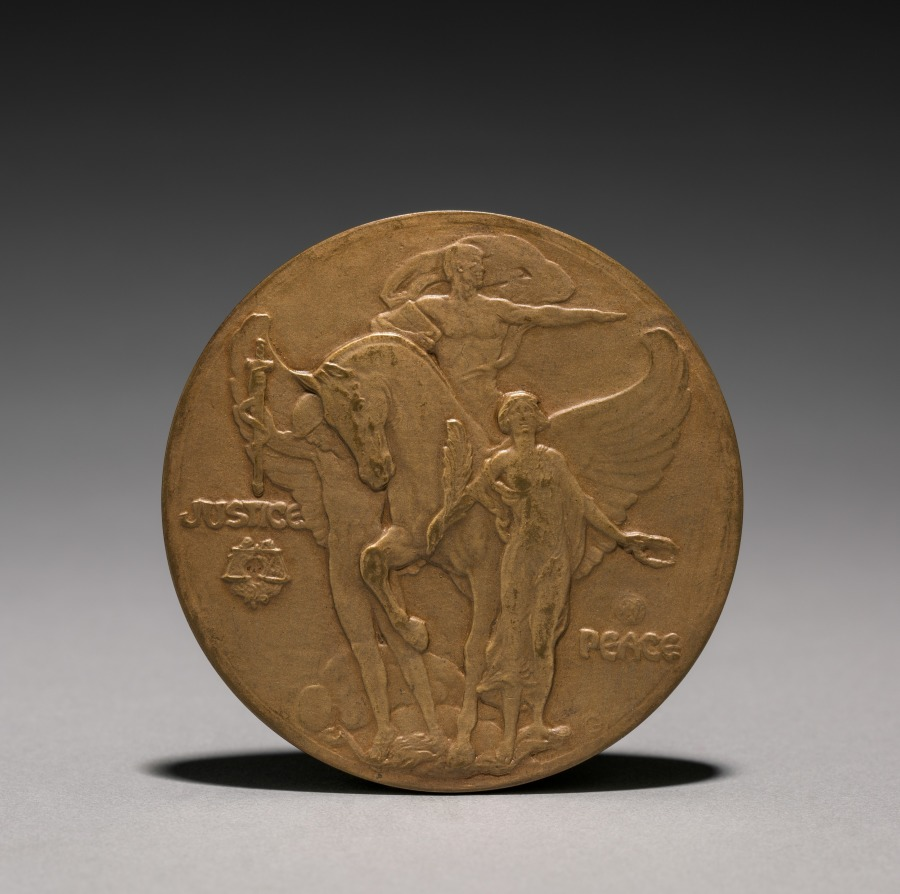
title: Medal to Commemorate the Treaty of Versailles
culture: America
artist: Chester Beach (American, 1881–1956)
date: 1919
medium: bronze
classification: Metalwork